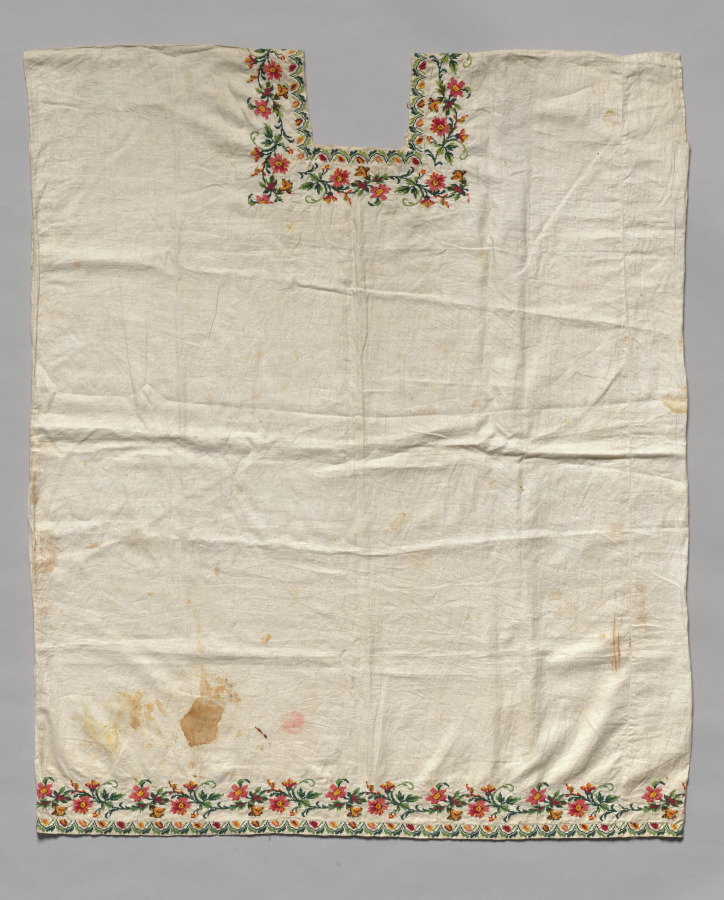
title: Embroidered Woman's Garment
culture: Mexico, Yucatan, 19th century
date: 1800s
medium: plain weave cotton; embroidered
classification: Embroidery